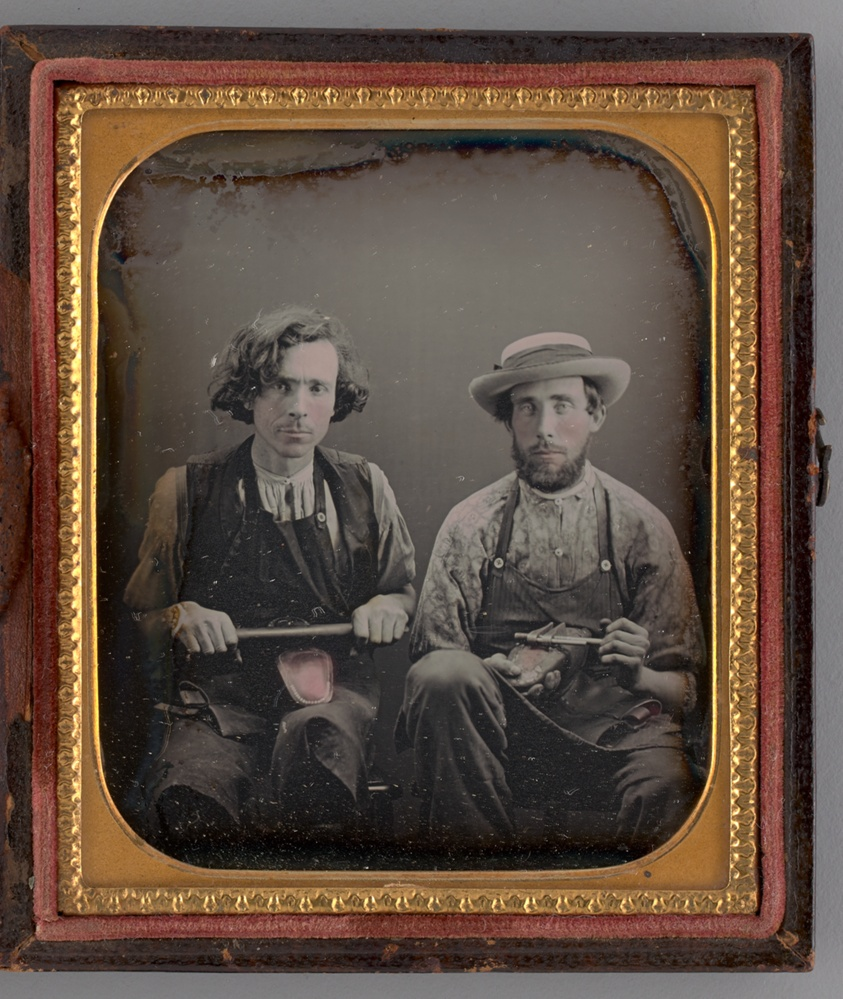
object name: Photograph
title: Untitled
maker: Unknown maker; American, 19th century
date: 1853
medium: Daguerreotype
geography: United States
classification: portrait; daguerreotype; portrait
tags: lundberg collection, Male, portraits, portraits: male subject, portraits: multiple subjects